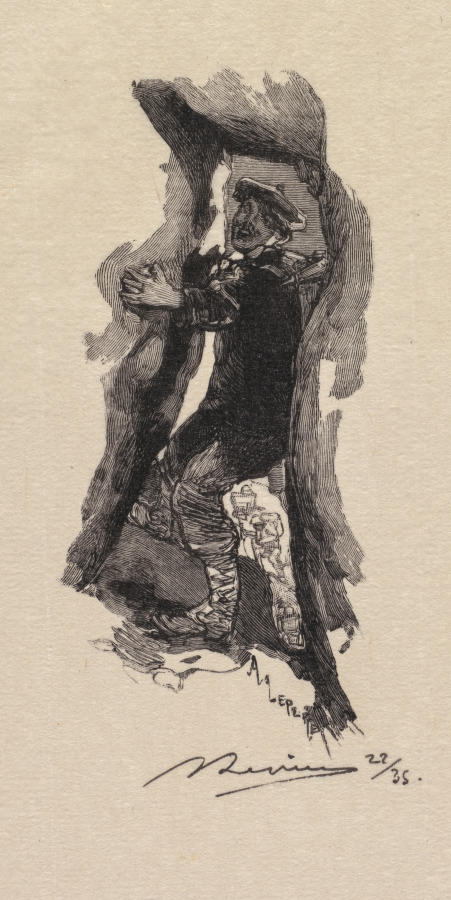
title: Fontainebleau Forest: Pass of the Seven Caverns (La Forêt de Fontainebleau: Au défilé de Sept-Cavernes)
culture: France, 19th century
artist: Auguste Louis Lepère (French, 1849–1918)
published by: A. Desmoulins, Published in Revue Illustrée, 1887–90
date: 1890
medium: wood engraving from bound volume of 34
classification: Bound Volume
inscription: On block, lower right: ALEPERE.; below image, lower right, in black ink: ALepère 22/35; on nwindow mat, lower right, in graphite: Au défilé des 7 Cavernes